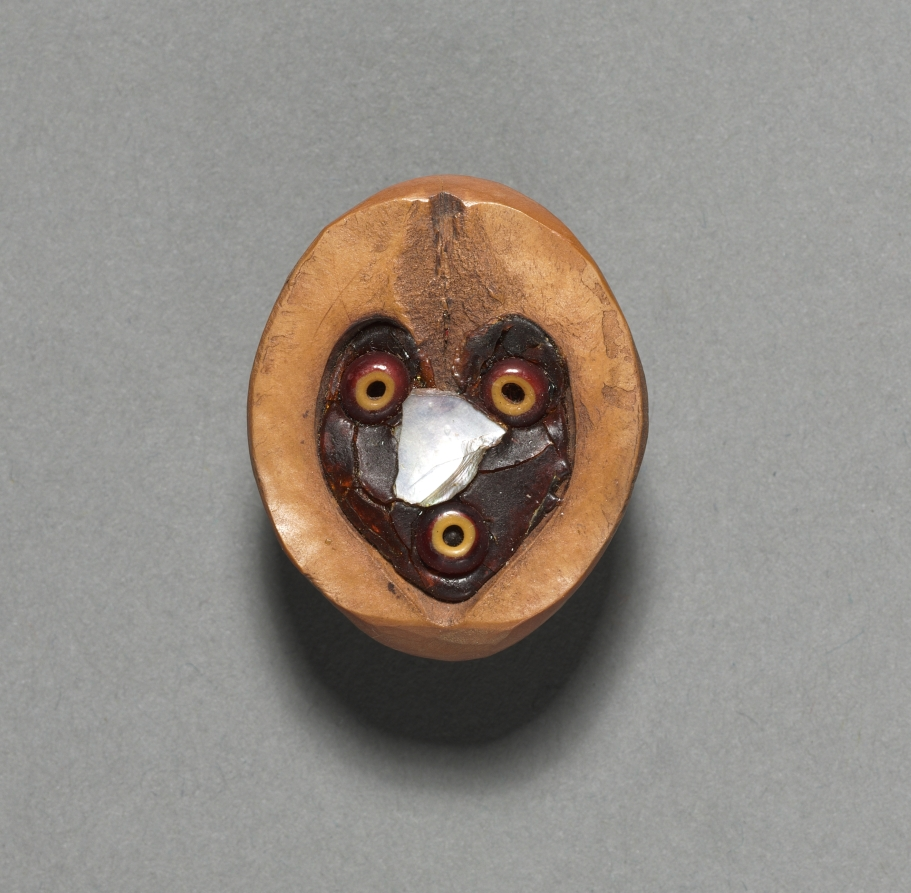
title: Gambling Dice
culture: California, Tulare, Unassigned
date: before 1917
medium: hollow shell, resin, glass beads, mica/shell fragment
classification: Implements